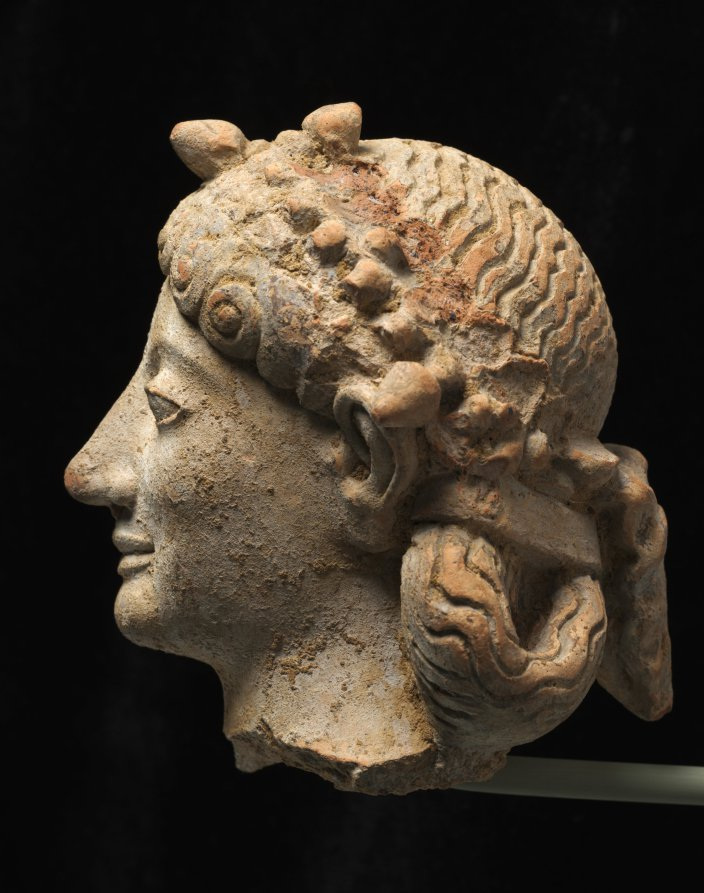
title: Head of Artemis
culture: Greece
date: 600–575 BCE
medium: terracotta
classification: Sculpture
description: Artemis was the goddess of hunting. Her long straight nose, almond-shaped eyes, and "archaic smile" are very similar to those of Atalanta on the contemporary white-ground lekythos (1966.114)